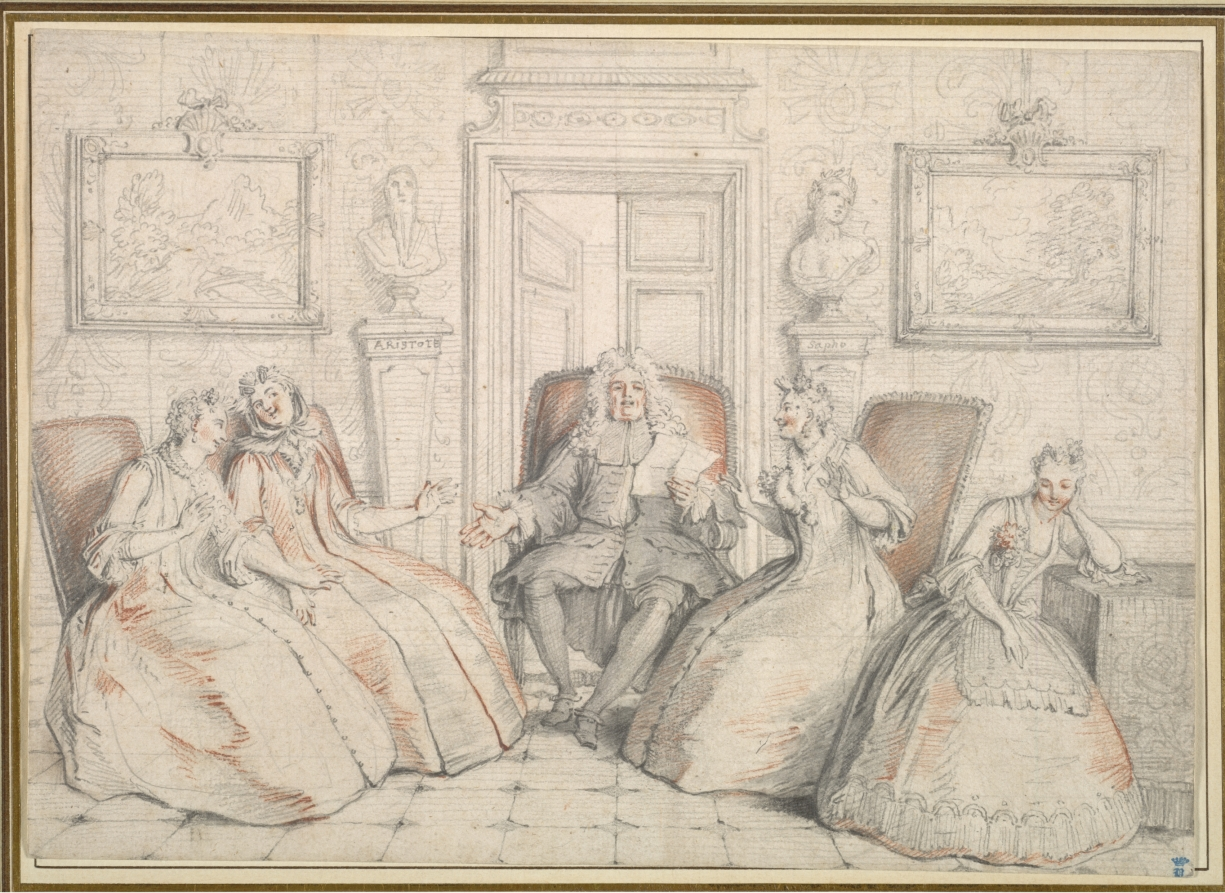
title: Trissotin Reading to Philaminte, Bélise, and Armande (from act 3, scene 2 of Molière's "Les Femmes Savantes"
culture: France, 18th century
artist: Charles Coypel (French, 1694–1752)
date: probably c. 1725–1726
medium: graphite, graphite wash, and red chalk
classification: Drawing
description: The son of Antoine Coypel (whose drawing is on view nearby), Charles Coypel was a playwright as well as an artist, so his understanding of the theater was profound. This is the only known drawing for the series of prints Coypel designed after scenes from famous works by the great playwright Molière (about 1622-1673). For the subject of this drawing, Coypel chose a famous scene from The Learned Ladies, in which the pompous tutor, Trissotin, reads his own work to his pretentious female admirers, Philaminte, Bélise, and Armande, all of whom have been duped by his pseudo-intellectualism. The overly enthusiastic gestures of these women contrast with the quiet dejection of Henrietta at the far right. The sensitive daughter of Philaminte, she is the only one not taken in by Trissotin's pretensions.